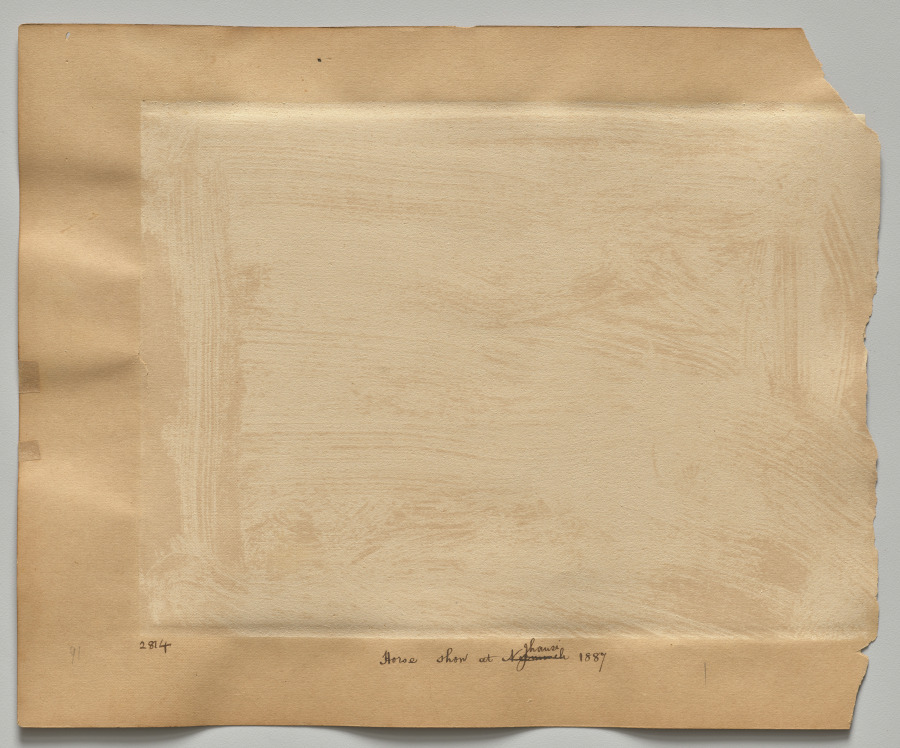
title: Judging at the Horseshow at Jhansi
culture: India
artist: Raja Deen Dayal (Indian, 1844–1905)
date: c. 1882–87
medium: albumen print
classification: Photograph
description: These photographs are part of an album, now disassembled, of around 105 photographs taken in India between 1885 and summer 1887 that provide glimpses into the lives of the British colonial elite and royal and upper-class Indians. The museum holds another group of 37 pictures from this album (2016.266), which was probably commissioned by a British civil servant visiting or working in India around 1888 as a personal souvenir of his experiences there.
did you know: Raja Deen Dayal is regarded now, and was considered during his lifetime, to be India’s most important 19th-century photographer.